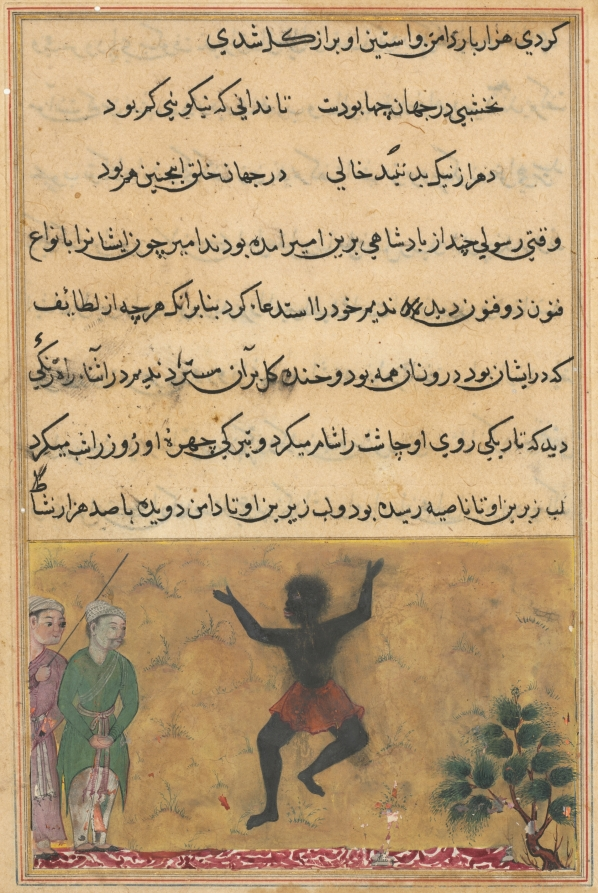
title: The court jester meets a Zangi dancing with joy, and learns from him that the cause of his happiness is his assignation with a woman who is the jester’s own wife, from a Tuti-nama (Tales of a Parrot): Twenty-second Night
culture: Mughal India, court of Akbar (reigned 1556–1605)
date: c. 1560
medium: gum tempera, ink, and gold on paper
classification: Painting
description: In the opening scene of the parrot’s bawdy story about a jester, who is shown wearing green on his way to perform at the court of the emir, he came upon an Ethiopian, known as Zangi, dancing by the side of the road. When he learned that the Zangi was overjoyed because he was planning to meet his beloved, the jester’s own wife, the jester was so distraught he was unable to perform, and the emir threw him in prison. The artist depicted the Zangi as described in the text as semi-wild with caricatured physical traits, uncovered head, and little clothing.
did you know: The tale references stereotypes about Africans that were current in India and Iran when the text was written.